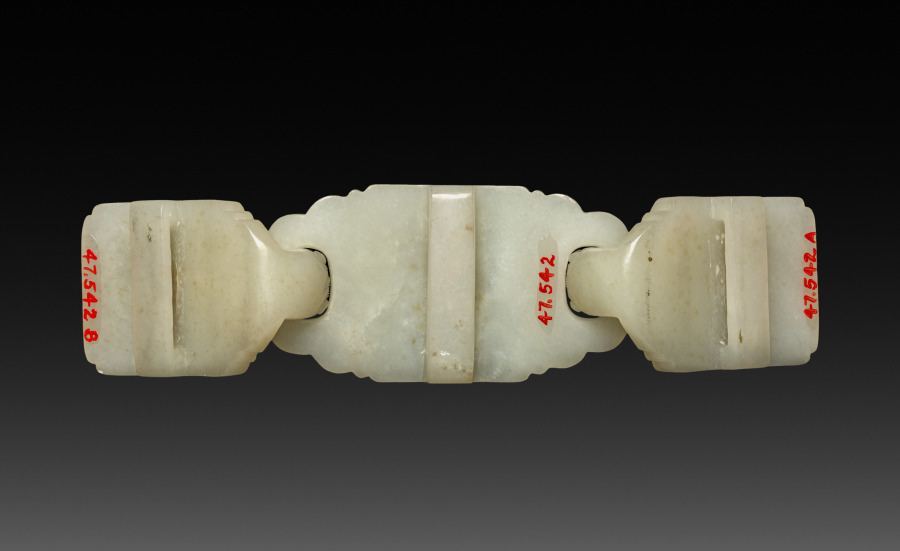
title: Buckle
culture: China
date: 1800s–1900s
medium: white jade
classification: Jewelry